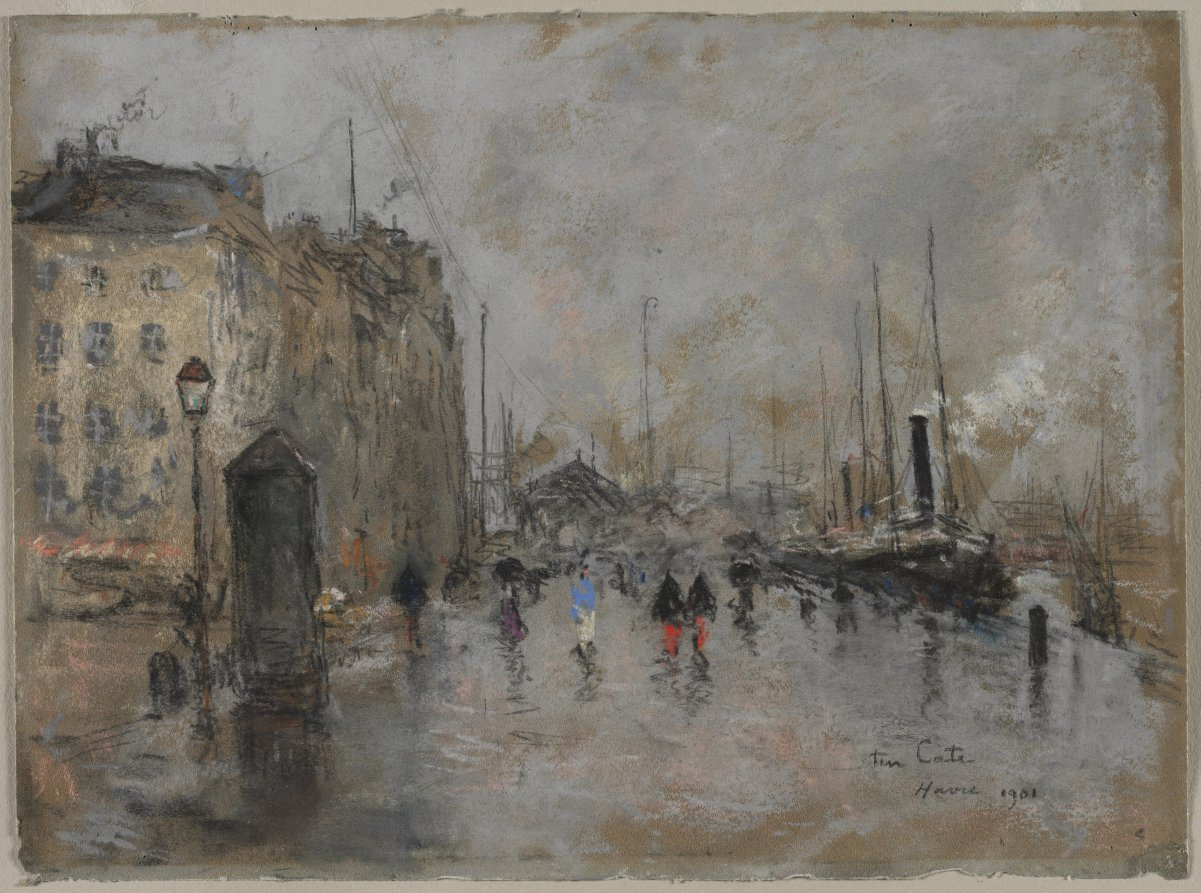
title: The Grand Quai of Le Havre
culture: Netherlands, early 20th Century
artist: Siebe Johannes ten Cate (Dutch, 1858–1908)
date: 1901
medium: pastel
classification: Drawing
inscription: signed, lower right, in black pastel: ten Cate / Havre 1901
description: Born in Holland, Ten Cate spent most of his career in Paris where he briefly shared an apartment in Montmartre with his friend the artist Kees van Dongen, and was also acquainted with Vincent van Gogh. He was known for his pastels of harbors and cityscapes. This melancholic view of Le Havre conveys the damp chill of an autumn twilight.